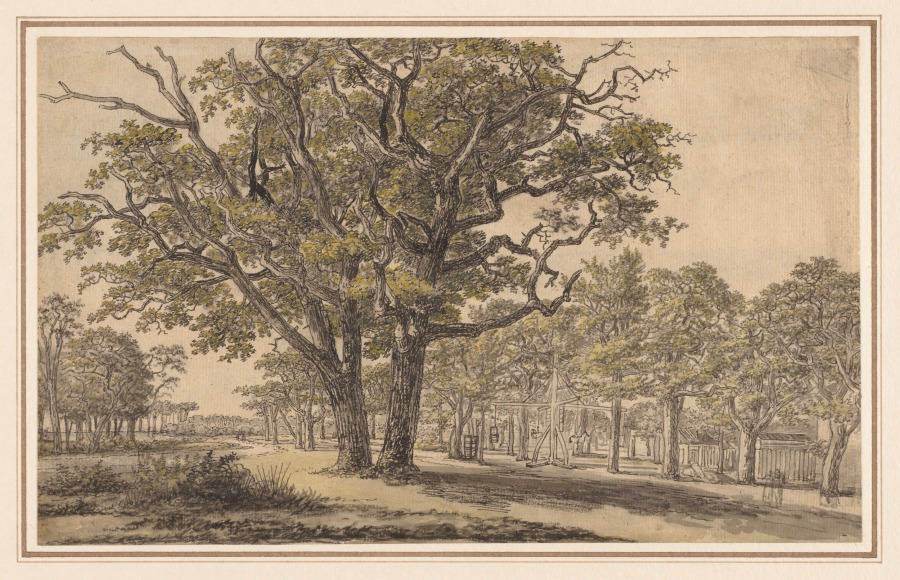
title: Landscape (recto) Two Views of Paris (verso)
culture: France, 19th century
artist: Georges Michel (French, 1763–1843)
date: first half 1800s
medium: pen and black ink, brush and gray and yellow wash, yellow gouache, and black chalk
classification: Drawing